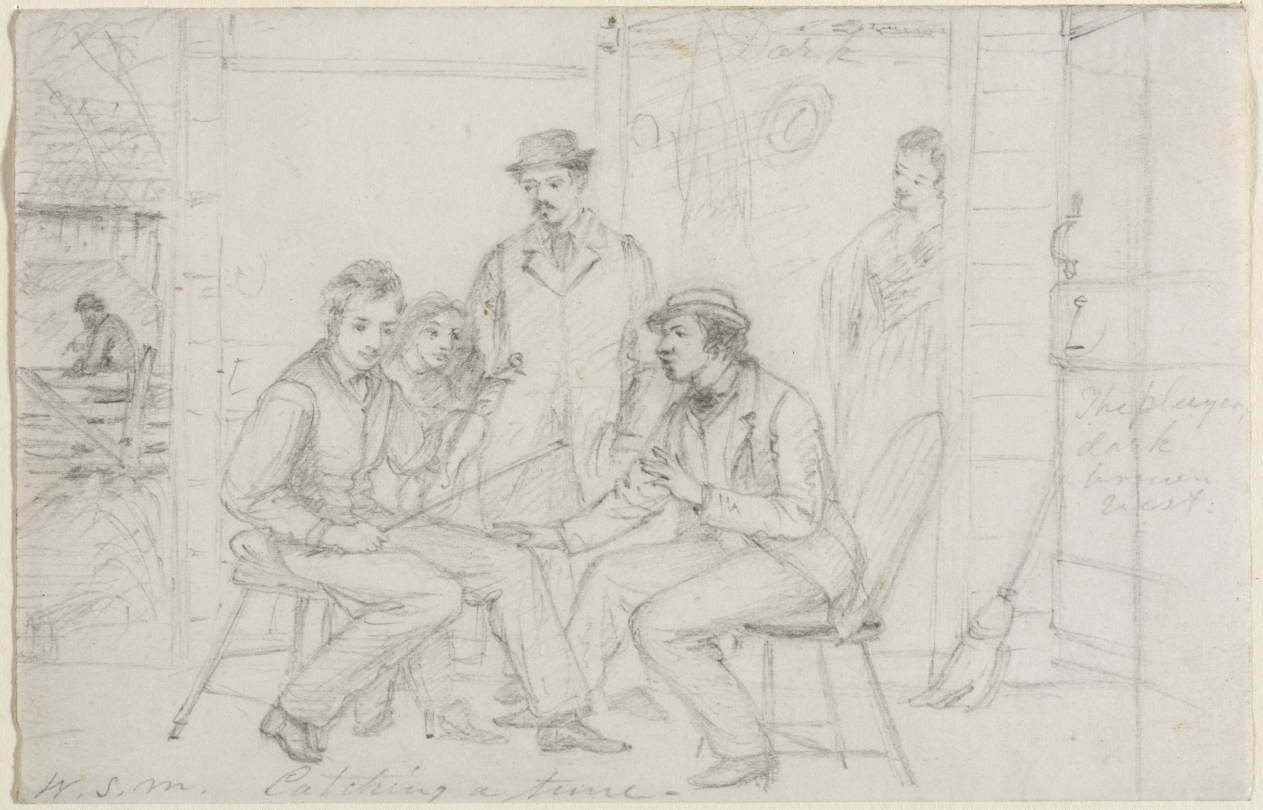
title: Catching a Tune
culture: America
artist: William Sidney Mount (American, 1807–1868)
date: probably 1867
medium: graphite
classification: Drawing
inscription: Signed, lower left, in graphite: "W.S.M. Catching a tune-"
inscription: Written in pencil, upper center by artist: "Dark"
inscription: Written in pencil, center right, by artist: "The player / dark / brown / best"